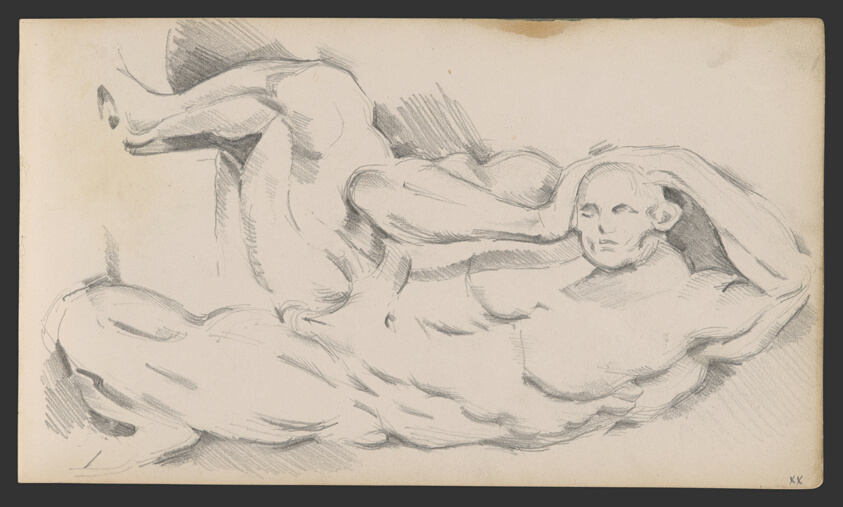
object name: Drawing and Watercolor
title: Sketchbook No. 2 (L'Estaque)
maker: Paul Cézanne; French, 1839-1906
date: 1875–86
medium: Graphite and pen and ink drawings on paper, bound into a book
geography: France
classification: sketchbook; graphite; prints and drawing; paper